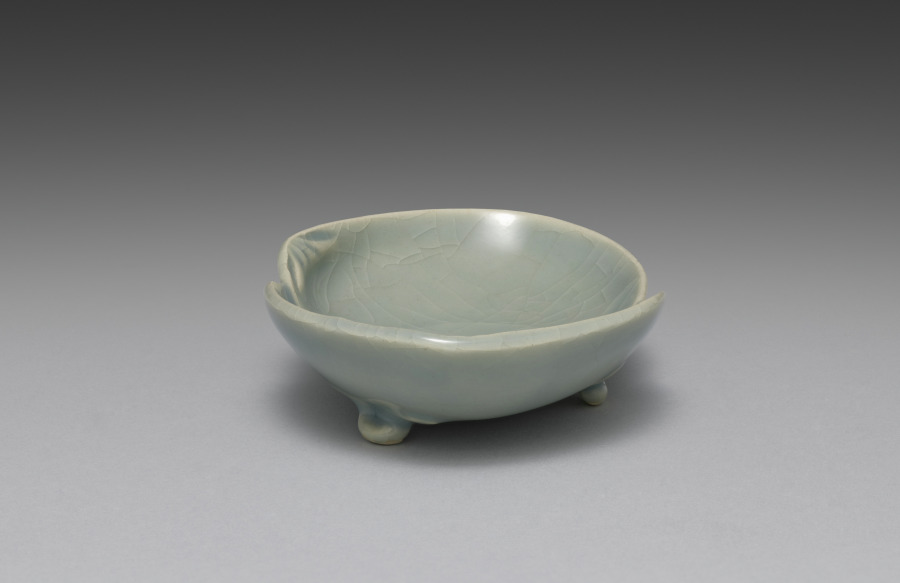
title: Dish from Saucers with Matching Shells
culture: Japan, Meiji period (1868–1912)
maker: Seifū Yohei III (Japanese, 1851–1914)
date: 1893–1914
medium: Porcelain with molded design and green crackled glaze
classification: Ceramic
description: Yohei III’s main output for his sophisticated clientele was in the form of tea sets and dining sets. He created a range of dishes in green glazes. He often produced in pairs, sets of five, or sets of ten. The set of five dishes with a more complex form is described as having a “water-colored glaze” (mizuiroyū). These are shaped like clam half shells, a reference to a game in which shell halves painted with narrative scenes or a variety of motifs must be matched back together by the players. The dishes have molded details to articulate the shell forms, and the crackling across each shell adds another dimension to the surface. Each dish is set on three small feet, formed by a pinched piece of clay and attached to an unglazed area on the underside of the dish. Curiously, while four of the dishes are stamped with the artist’s mark, one has instead a signature carved into the base.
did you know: Each of the paired-shell dishes has its own compartment in a long, flat box.